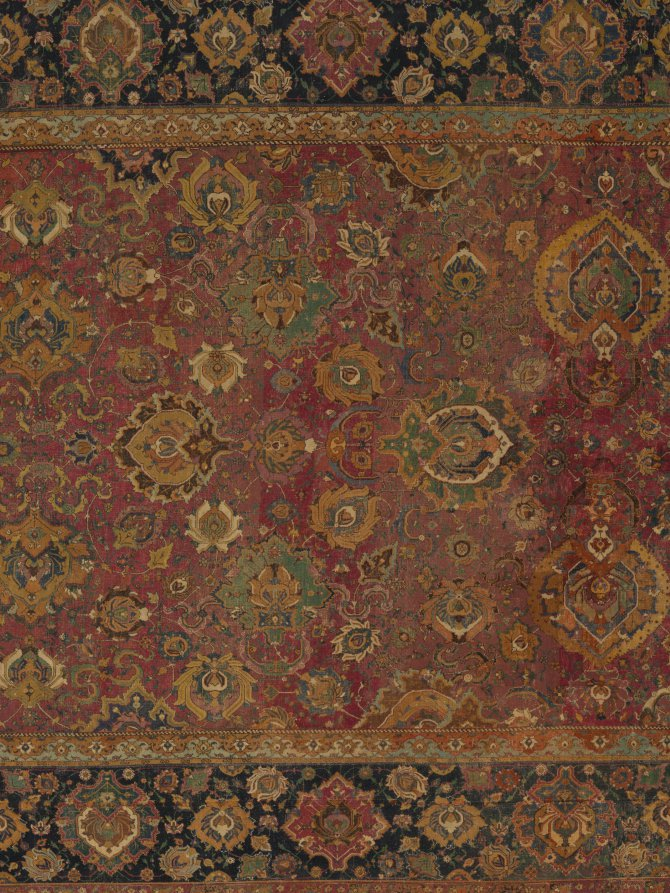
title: Carpet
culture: Iran, Herat, 16th century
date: 1500s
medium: senna knot: wool and cotton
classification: Carpet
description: The Mughals, with their nomadic Central Asian roots, were constantly on the move. They were adept at transporting the trappings of their residences and bases of operation from place to place. Fine carpets and canopies demarcated places of importance, and could be rolled up and moved when the ruler was ready to consolidate his power at a new location. When they settled in stone palaces in India, the interiors were covered with carpets, lending a warmth to the spaces that cannot be felt at the sites today. This carpet is of the type that the Mughals would have acquired for their residences. Mughal paintings are filled with depictions of carpets and textiles, many ornamented, like this one, with delicate and complex palmette-dominated arabesque patterns that evoke a paradisiacal setting.